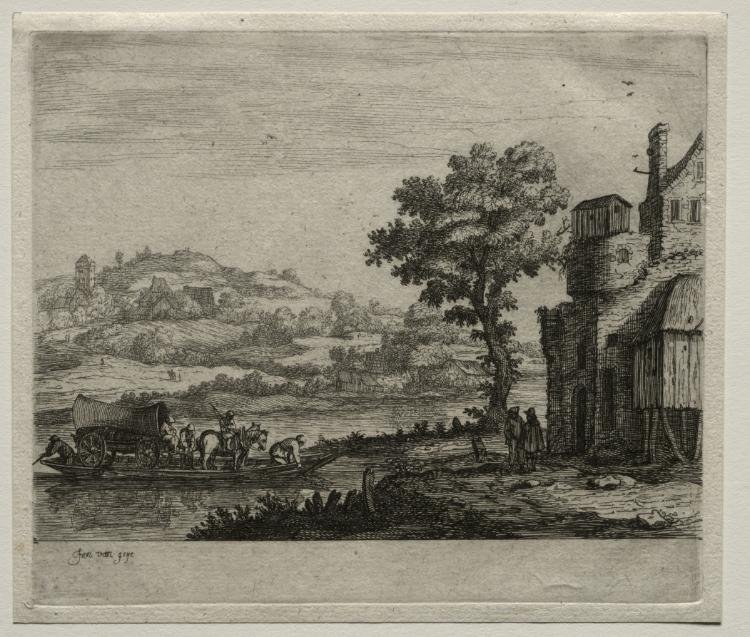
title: The Ferry Boat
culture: Netherlands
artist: Jan van Goyen (Dutch, 1596–1656)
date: c. 1650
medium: etching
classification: Print